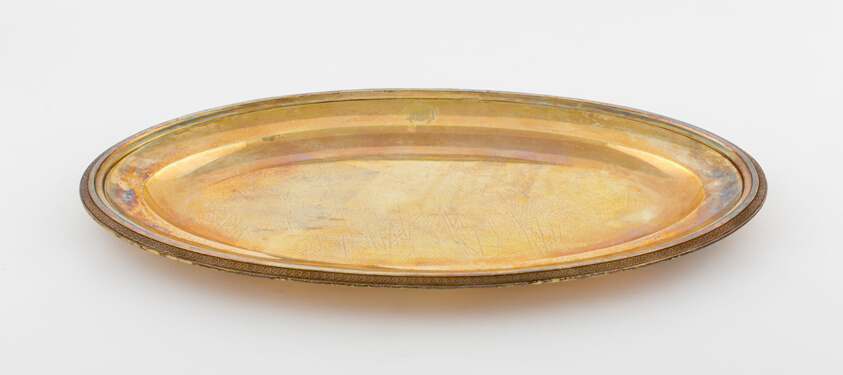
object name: Metalwork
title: Pair of Platters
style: napoleonic, empire, Neoclassicism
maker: Martin-Guillaume Biennais (French, 1764-1843); Paris, France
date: c. 1794-1819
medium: Gilt silver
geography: Paris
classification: dish (vessel); silver; vessel for serving food; metalwork; european decorative arts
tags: Borghese Service, dining, Napoleon